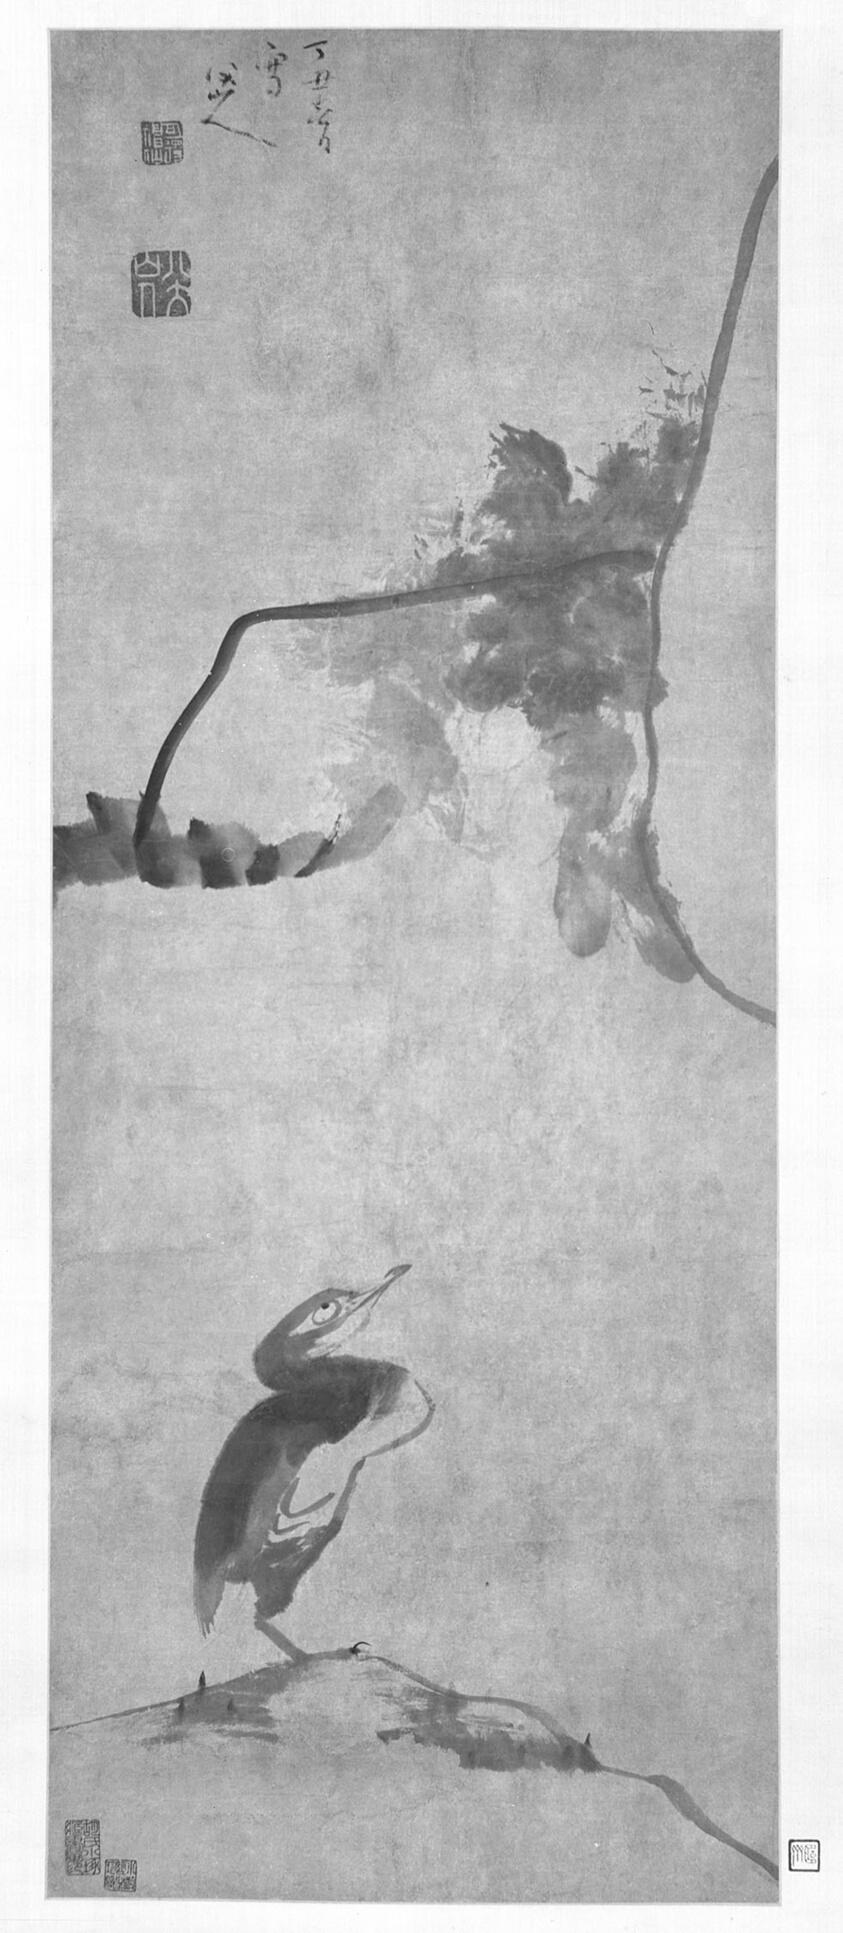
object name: Painting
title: Lotus and Waterfowl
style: Chinese (culture or style)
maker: Attributed to Zhu Da 朱耷 (Chinese, 1626-c.1705)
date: Qing dynasty (1644–1911), 1697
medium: Hanging scroll; ink on paper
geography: China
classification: hanging scroll; painting; asian art